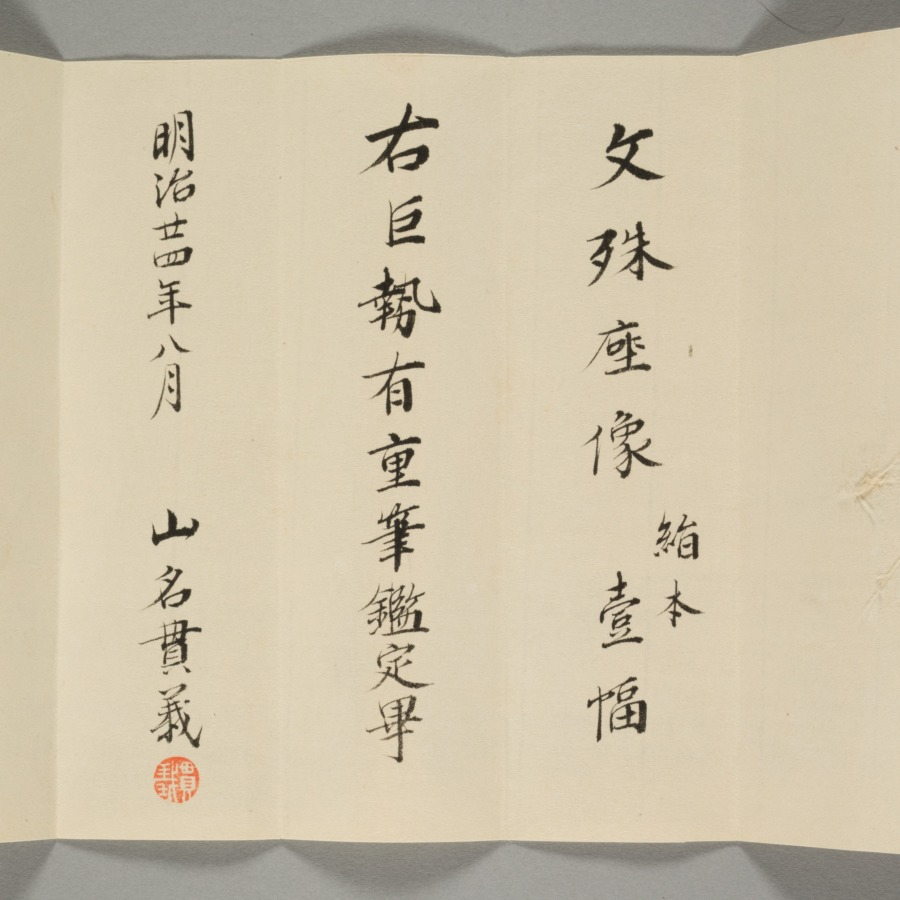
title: Monju as a Child (Chigo Monju)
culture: Japan, Muromachi period (1392–1573)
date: early 1400s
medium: hanging scroll; ink, color, and gold on silk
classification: Painting